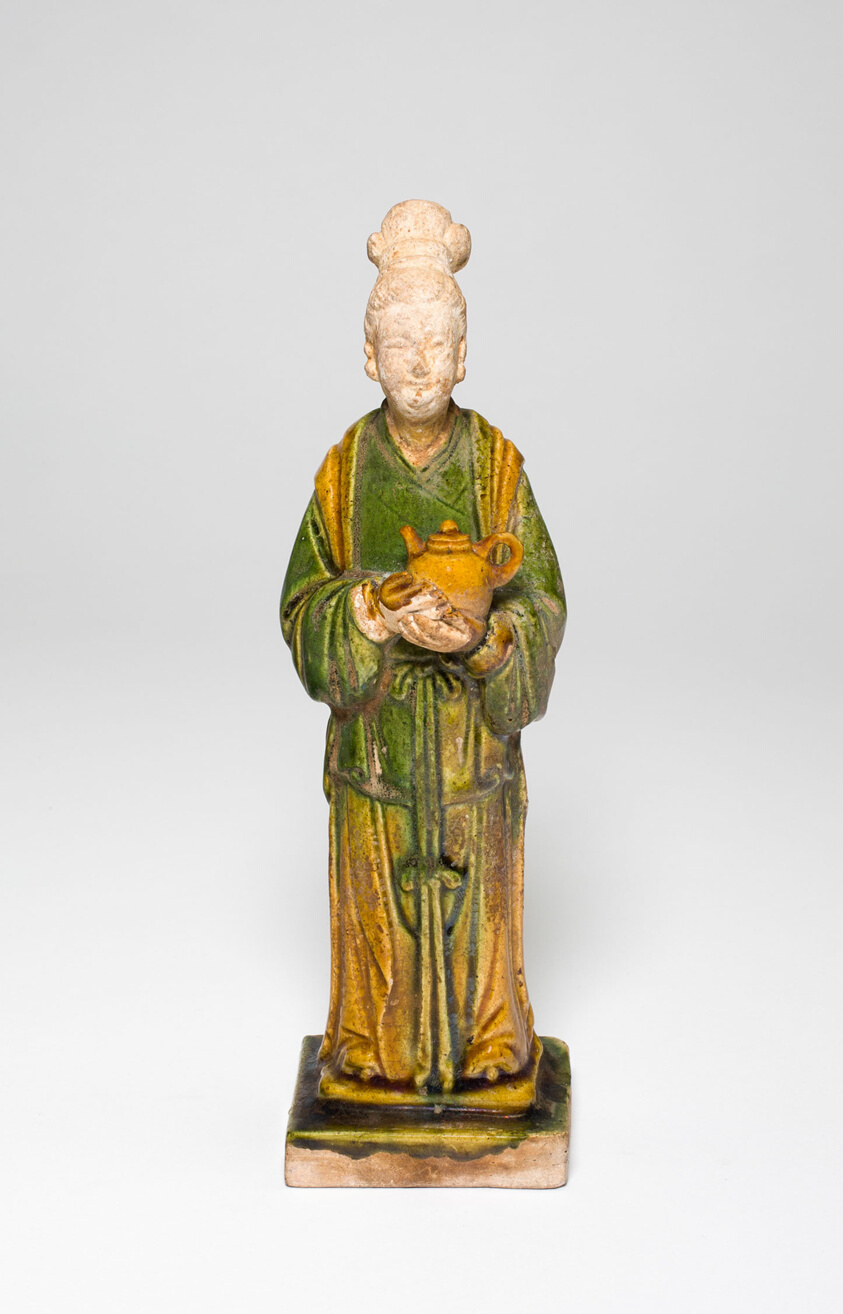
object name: Sculpture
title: Attendant Holding a Teapot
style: Chinese (culture or style)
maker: China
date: Ming dynasty (1368–1644)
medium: Glazed earthenware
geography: China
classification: statuette; earthenware; sculpture; asian art; ceramics